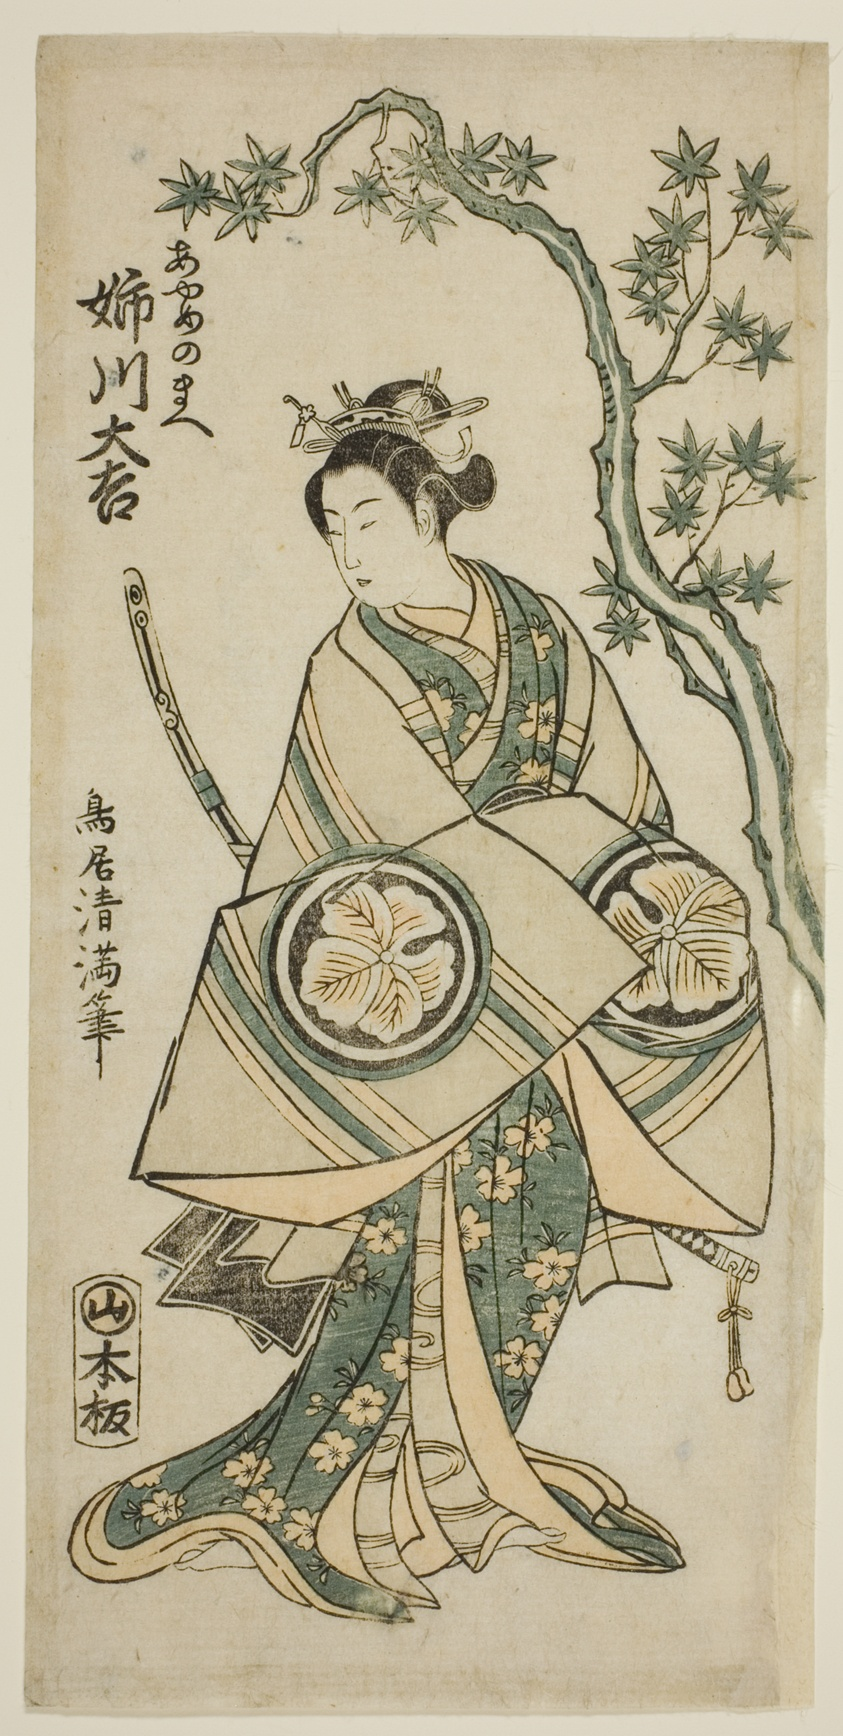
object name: Print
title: The Actor Anegawa Daikichi as Ayame no Mae in the play "Miyo no Hana Yunzei Kagami," performed at the Morita Theater in the eleventh month, 1760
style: Japanese (culture or style)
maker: Torii Kiyomitsu I (Japanese, 1735–1785)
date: 1760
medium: Color woodblock print; hosoban, benizuri-e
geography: Japan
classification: woodblock print; print; asian art